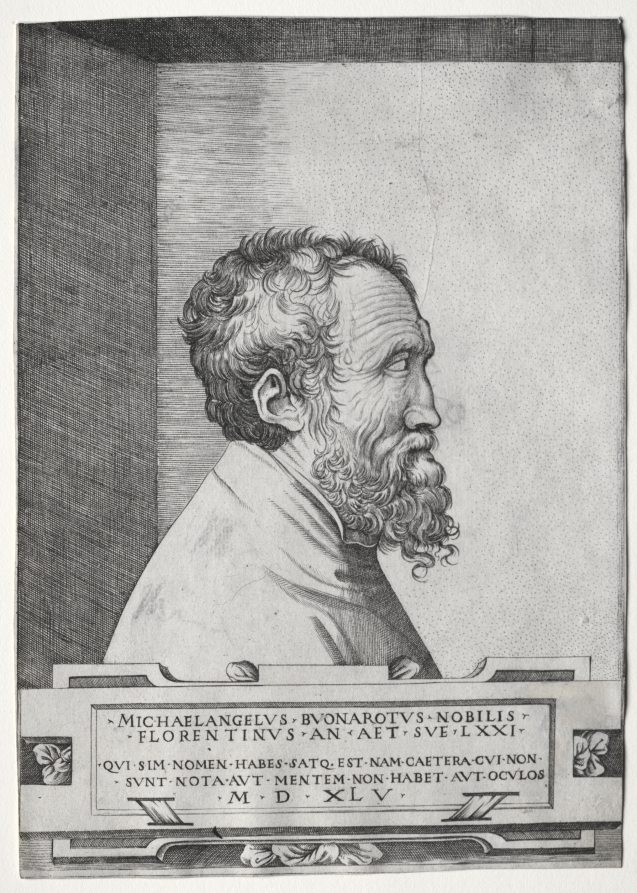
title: Portrait of Michelangelo in profile facing right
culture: Italy, 16th century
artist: Giulio Bonasone (Italian, c. 1510–after 1576)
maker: attributed to Enea Vico (Italian, 1523–1567)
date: 16th century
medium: engraving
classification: Print